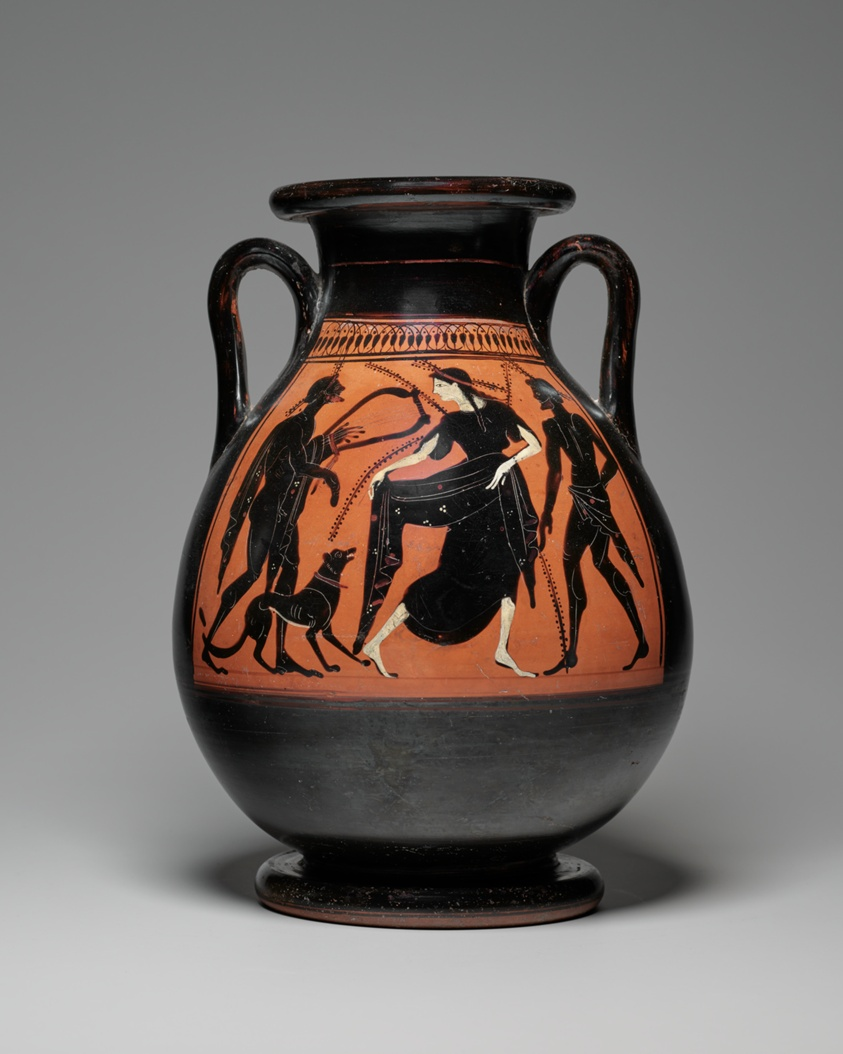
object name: Vessel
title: Pelike (Storage Jar)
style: greek, black-figure, ancient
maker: Greek; Athens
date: about 510-500 BCE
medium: terracotta, black-figure with applied paint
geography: Greece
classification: vessel; ceramics; ancient art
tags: dancing, drinking, music, dogs, instruments, woman